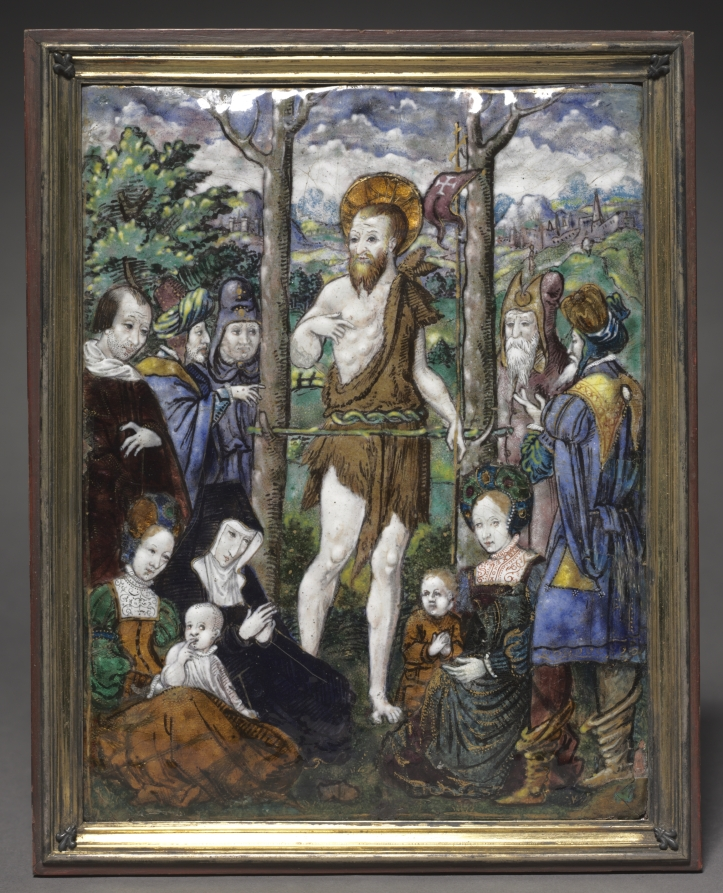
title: Preachment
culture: France, 16th century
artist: circle of Léonard Limousin (French, c. 1505–1577)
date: 1500s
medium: painted enamel on copper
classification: Enamel